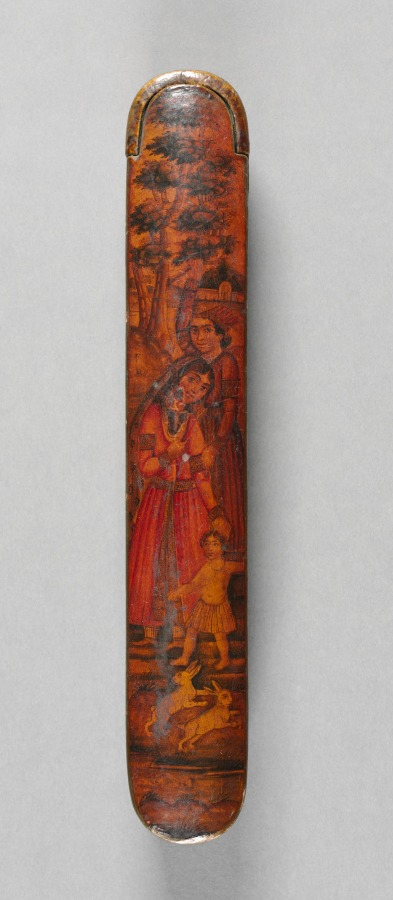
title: Pen and Ink Box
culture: Iran, Qajar period (1779-1925)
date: 1800s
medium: lacquer over papier maché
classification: Lacquer